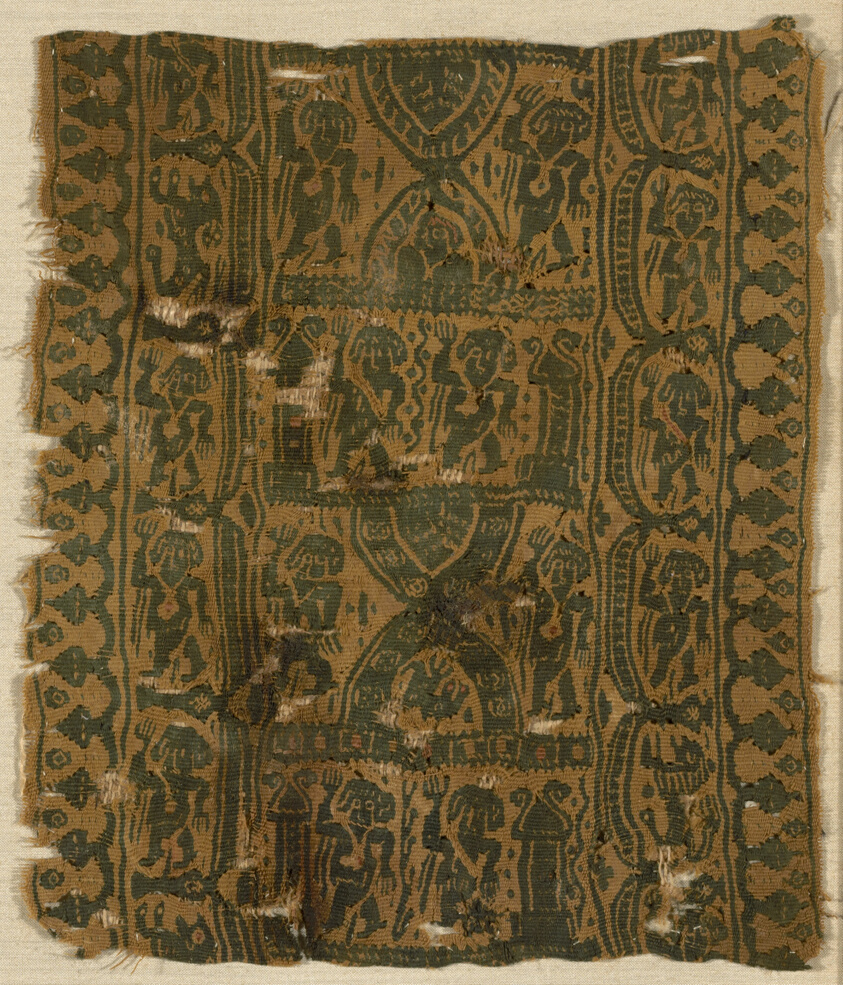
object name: Textile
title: Fragment (Border)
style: roman period (egyptian), greco-roman (egyptian)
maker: Coptic; Egypt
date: Roman period (30 B.C– 641 A.D.), 5th/6th century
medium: Wool and linen, slit tapestry weave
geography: Egypt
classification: textile; weaving